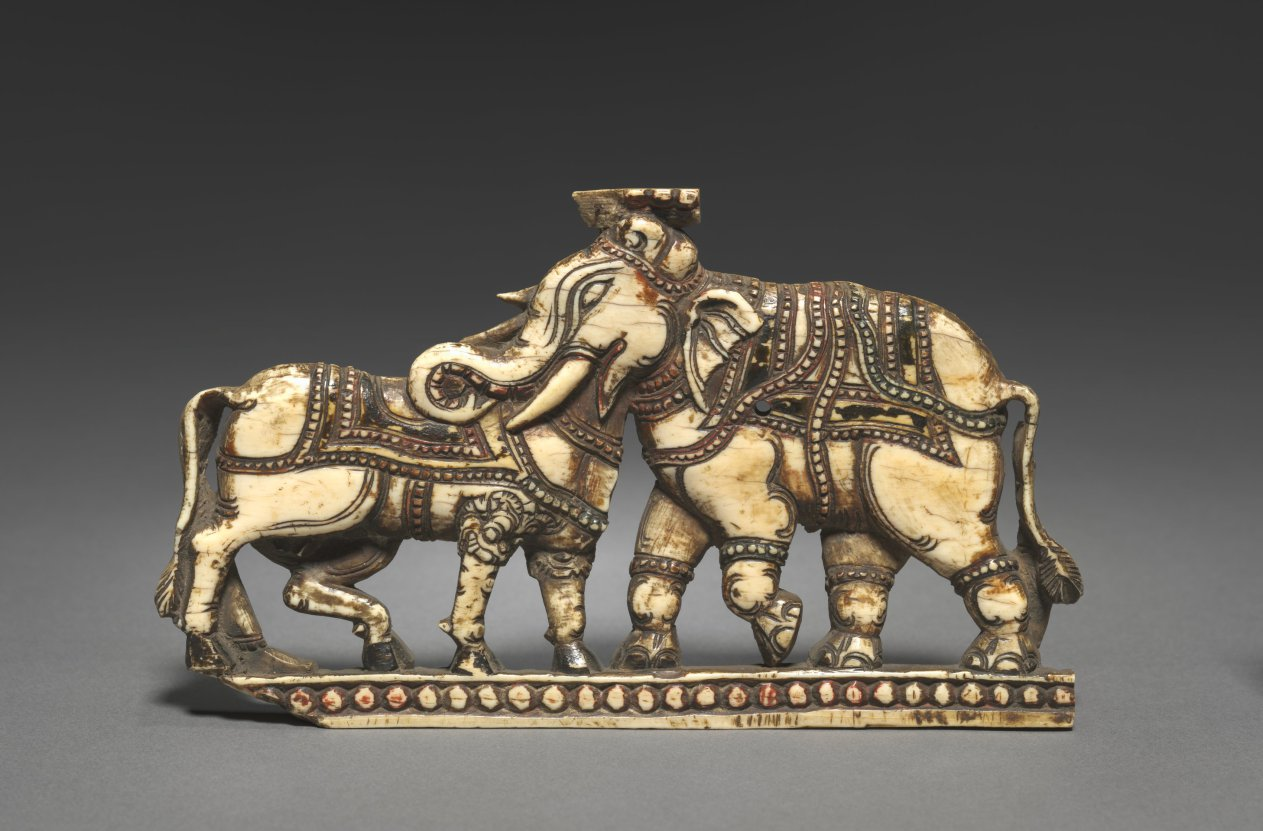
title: Bull and Elephant in Combat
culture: South India or Ceylon, 16th-17th century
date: 1500s-1600s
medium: ivory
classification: Ivory